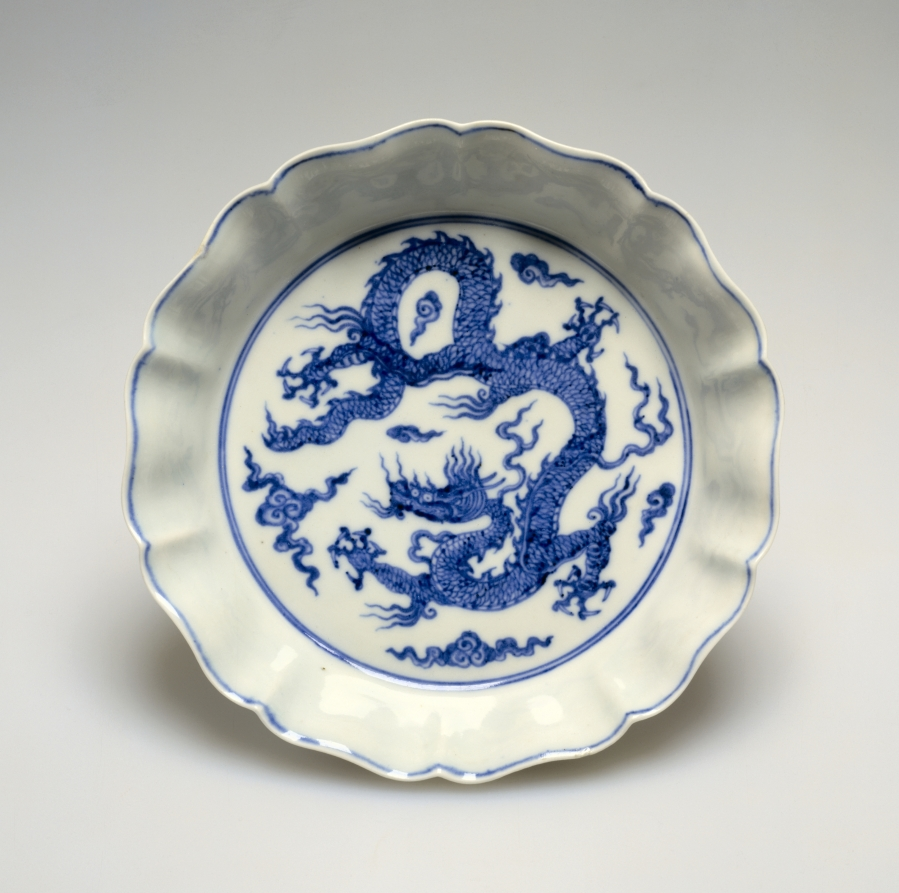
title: Brush Washer with Dragons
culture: China, Jiangxi province, Jingdezhen, Ming dynasty (1368-1644), Xuande reign (1426-35)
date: 1426–35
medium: porcelain with underglaze blue decoration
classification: Ceramic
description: The attractive tonal range found in the painted decoration, resulting from the irregular size of cobalt bits in the pigment, and the pocked glaze surface identify this stunning brush washer as a classic Xuande period piece despite the absence of a reign mark.